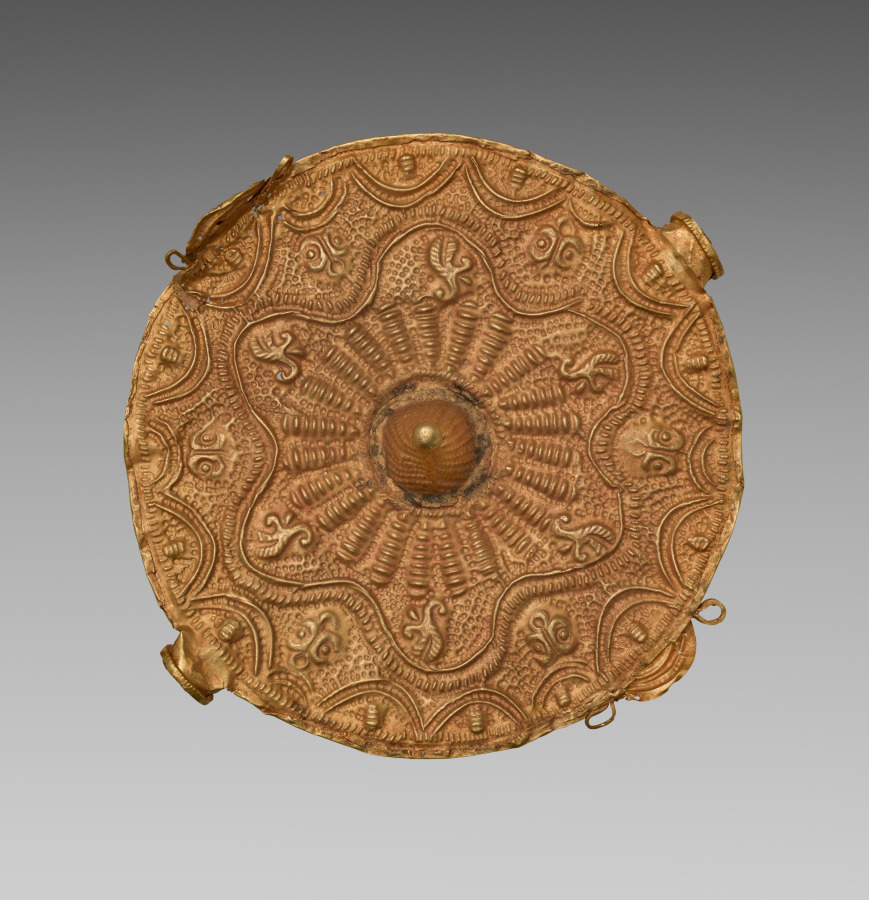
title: Disk Pendant (akrafokɔnmu)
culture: Africa, West Africa, Ghana, Asante Empire/ Kingdom, member of the goldsmiths’ guild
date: 1800s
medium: Gold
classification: Jewelry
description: Gold discs dangling on the chests of Akan state officials and elites showed their rank and duties. Worn by these akrafo (“soul people”) since the 1800s, they are often linked to kradware, officials who represent and purify (“wash”) the king’s soul. To make them, goldsmiths cast or flattened gold. Muslim North African gold coins likely inspired their form and material, while concentric water rings influenced their composition. This small disc is typical of pre-colonial examples. Gold ornament making ceased until 1924; court officials now wear large discs.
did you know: Gold miners from the Akan region once mined gold to make local objects like this and to supply gold for trade across trans-Saharan routes and into places as far away as Europe.